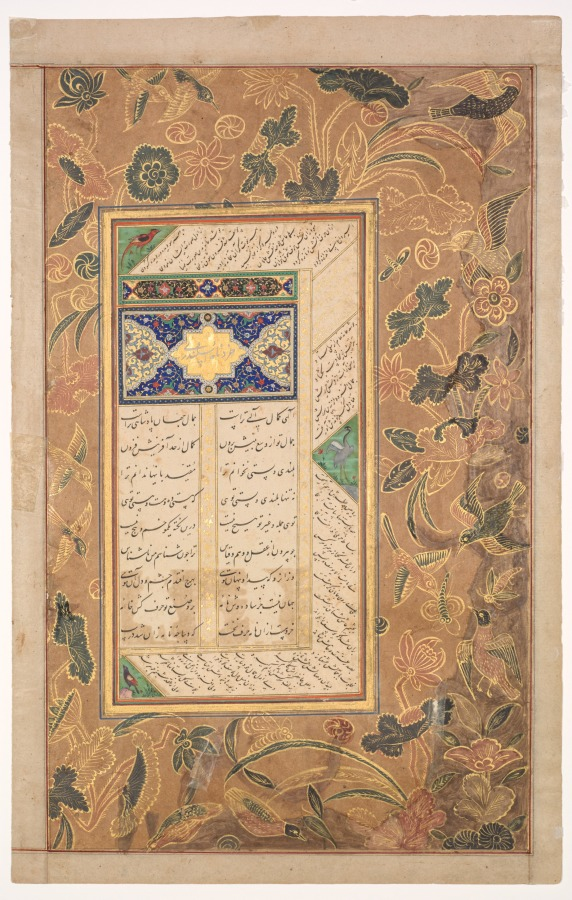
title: Illuminated page (verso), from a Panj Ganj (Five Treasures) of Abd al- Rahman Jami (Persian, 1414–1492) with two Persian masnavis: Yusuf va Zulaykha (Joseph and Zulaykha) and Khirad-nama-i Iskandari (Alexander’s Book of Wisdom)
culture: Western Afghanistan, Herat (text); Mughal India (paintings)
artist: Mushfiq (Indian, active early 1600s)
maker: Sultan 'Ali al-Mashadi (Iranian, 1430–1520)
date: 1603–7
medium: Gum tempera, ink, and gold on paper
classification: Painting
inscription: [[Persian title in gold, nasta’liq script]] Khirad-nama-I Iskandari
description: This section of text from Jami’s poem of Joseph and Zulaykha, written diagonally in the margins, describes the beauties of Zulaykha’s house, in which she intends to seduce Joseph. It includes the following verses: Jeweled lamps on the walls were hung / And odorous herbs were beneath them flung. / She gathered together all things most fair, / And unrolled the carpet of pleasure there. / But amid the charms of the sumptuous hall / She longed only for Joseph, far dearer than all. / A heavenly palace is dark and dim / To a lover whose darling is far from him. The longing of Zulaykha for Joseph metaphorically describes an imperfect devotee’s mystical love for God. With patience, forbearance, and virtuous actions, unification with the divine will eventually occur, even for the most flawed among us. On this page also begins the Khirad-nama-i Iskandari (Alexander’s Book of Wisdom), another of the five narrative poems that make up the Panj Ganj.